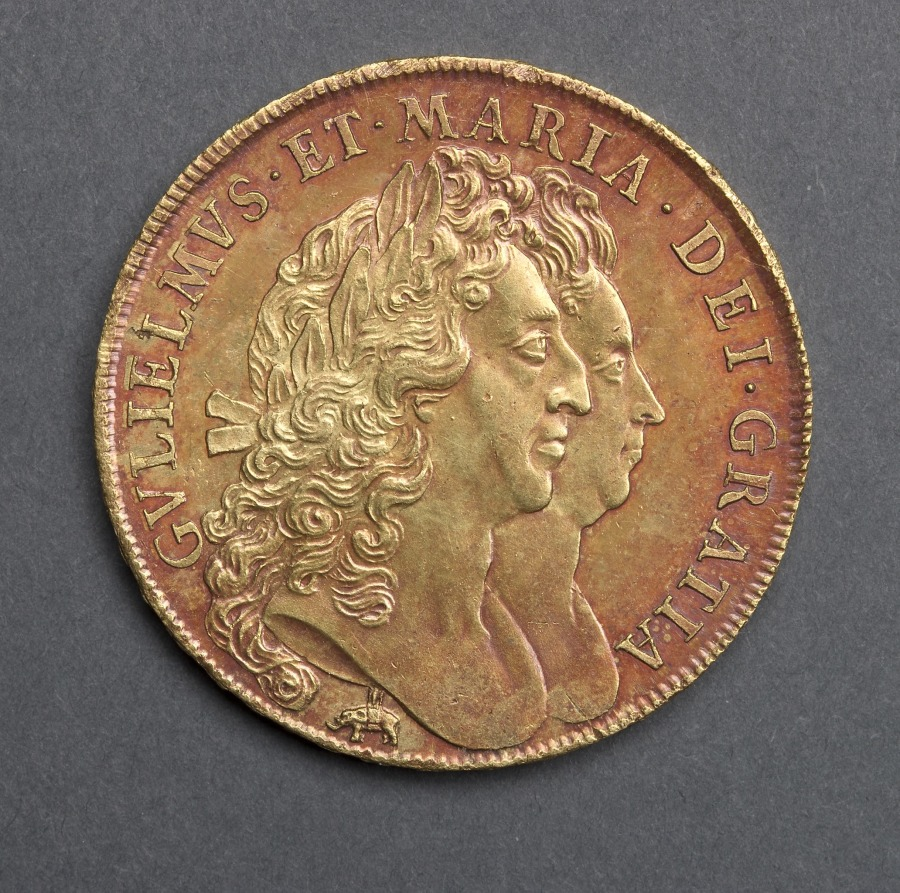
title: Five Guineas: William & Mary (obverse); Crowned Shield of Arms (reverse)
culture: England, William and Mary, 1688-1694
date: 1691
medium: gold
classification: Coins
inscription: GVLIELMVS. ET. MARIA. DEI. GRATIA.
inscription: MAG·BR·FR·ET·HIB·REX·ET·REGINA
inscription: DECS ET TUTAMEN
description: William of Orange-Nassau, and his wife Mary, daughter of James II, were proclaimed joint monarchs. Thus both their heads appear on their coinage. The only other instance of this in England is in the reign of Philip and Mary, 1554–58. Below them is a small elephant representing Guinea, the origin of the metal. William and Mary were invited to the English throne after James II had been driven from it, mainly because the people feared he was about to re-establish the Church of Rome.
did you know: The shield of arms includes Ireland, represented by a harp, and Scotland, represented by a lion.